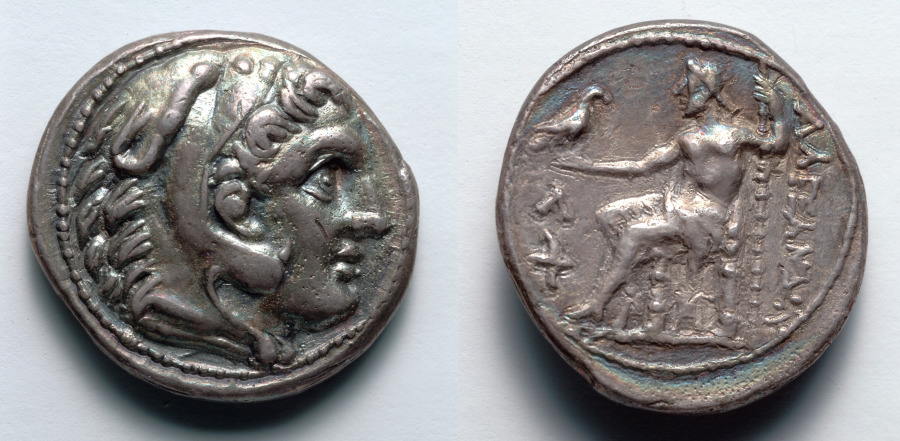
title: Tetradrachm: Head of Young Herakles (obverse); Zeus (reverse)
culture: Greek, Macedonian, minted at Amphipolis (Macedonia), reign of Alexander III [The Great]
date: 336–323 BCE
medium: silver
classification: Coins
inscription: Λ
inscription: ΑΛΕΞΑΝΔΡΟΥ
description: On this coin, the head of a youthful Herakles, wearing his lion-skin, appears on the obverse, with his father Zeus, king of the gods, seated on the reverse. For Alexander III (the Great), coins like this one projected power. Thus, while their attributes (lion-skin, eagle, scepter) identify hero and god, the inscription ΑΛΕΞΑΝΔΡΟΥ (of Alexander) identifies the leader.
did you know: Alexander the Great claimed descent from Herakles and Zeus, picturing them both on his coinage.